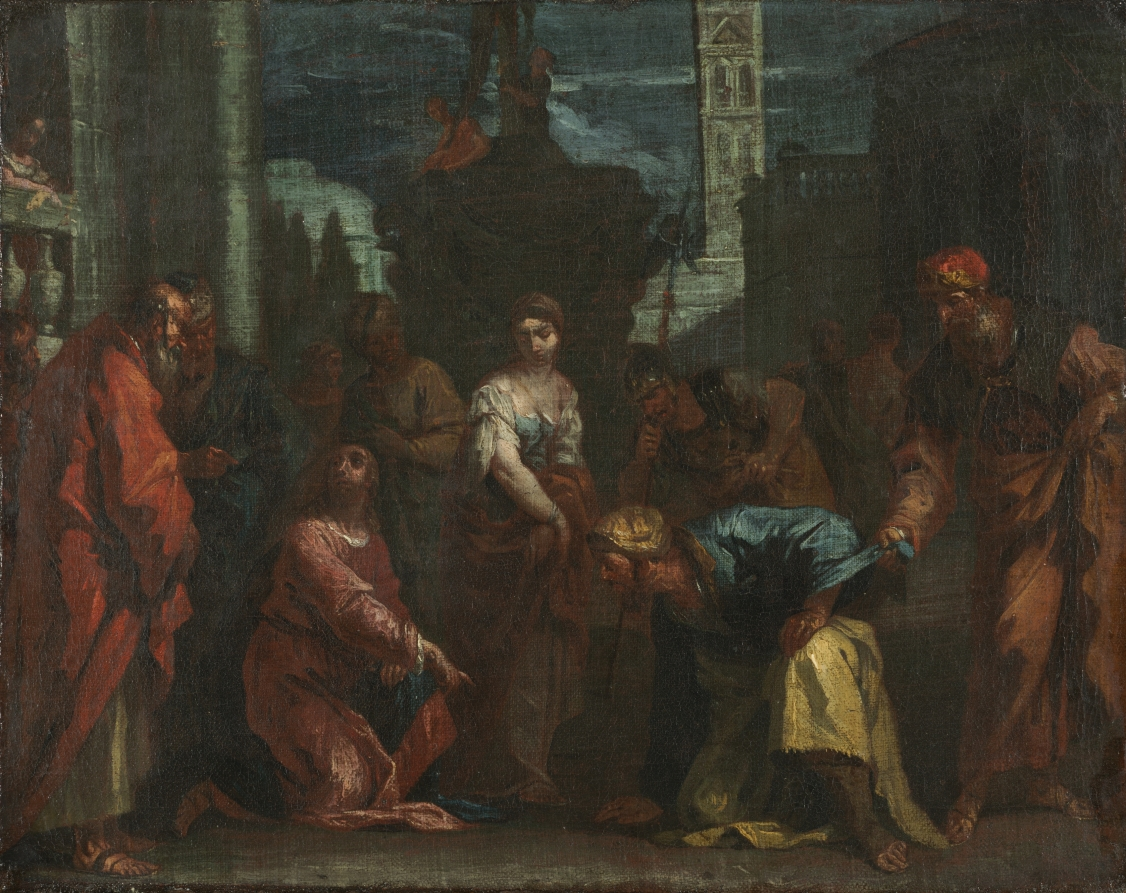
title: Christ and the Woman Taken in Adultery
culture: Italy, 18th century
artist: follower of Sebastiano Ricci (Italian, 1659–1734)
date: mid 1700s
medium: oil on canvas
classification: Painting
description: The subject originates in the Gospel of John 7:53-8:11, where Pharisees bring a woman accused of adultery to Christ, attempting to trick him into disobeying the Old Testament precept that she be stoned. In response, Christ interrupted his writing on the ground, stating: "Let anyone among you who is without sin be the first to throw a stone at her." The Pharisees, unable to retort, gradually disperse, and Christ eventually sends the woman away with an admonition not to sin again. The subject was popular in 18th-century Venice, partly because magnanimity was an important value, celebrated in visual, musical, and literary culture. The showy, exotic subject and the public presentation of an openly sexualized woman also enjoyed popularity in 18th-century Venetian painting. This work is a copy of the picture at the Minneapolis Institute of Arts, perhaps by a student (and certainly not by Ricci himself)